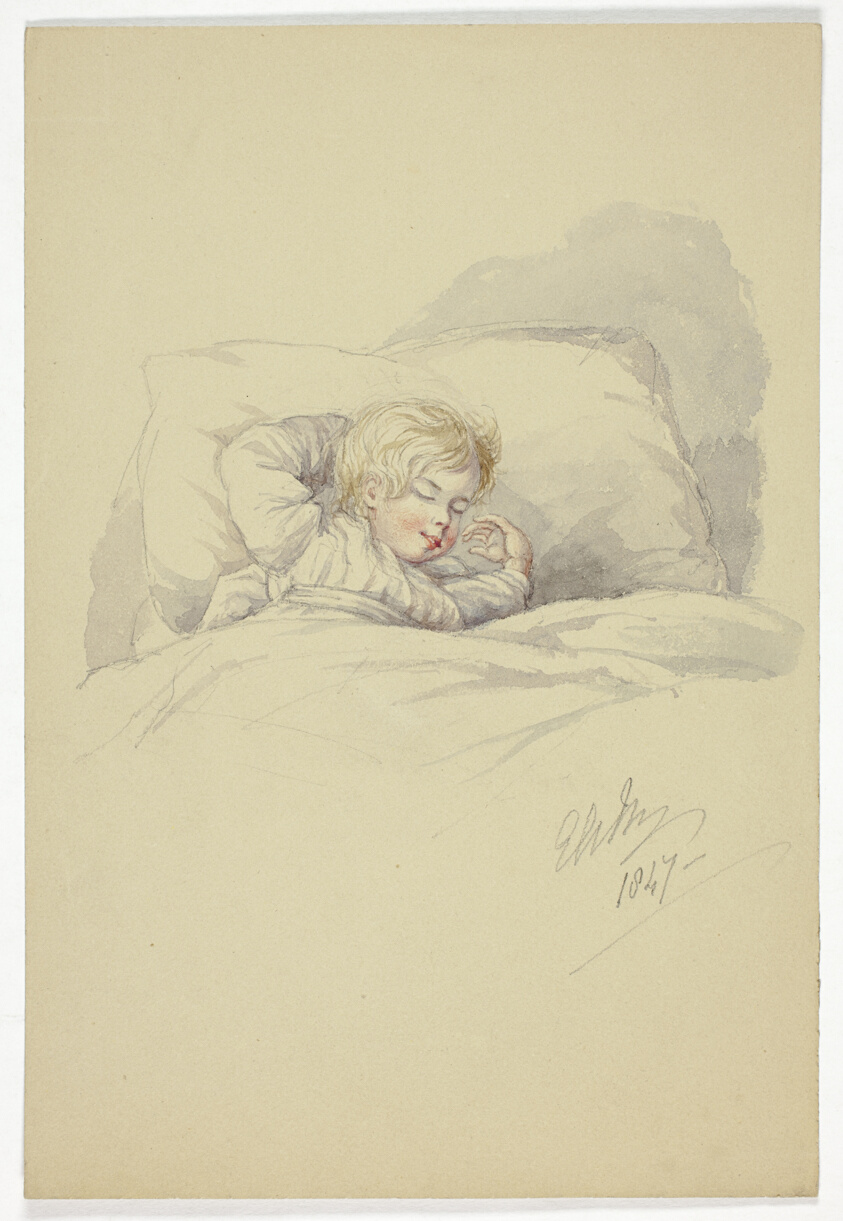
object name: Drawing and Watercolor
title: Child Asleep (recto), and Fishermen on Dock (verso)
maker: Elizabeth Murray (English, c. 1815-1882)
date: 1847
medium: Watercolor over graphite (recto), and graphite (verso), on brown-gray wove paper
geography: England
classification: watercolor; drawings (visual works); prints and drawing